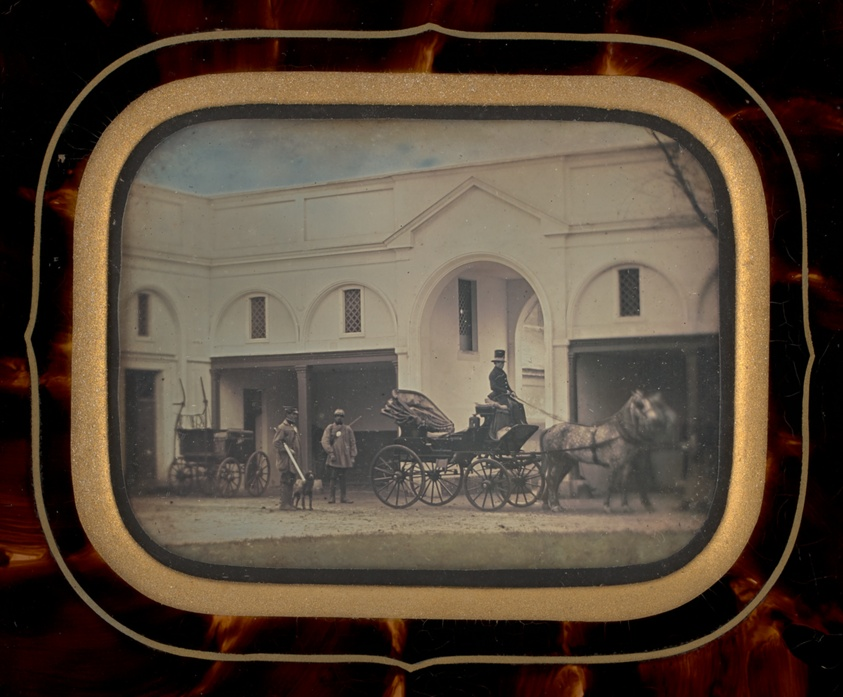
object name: Photograph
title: Untitled (Three Men and Horse-Drawn Carriage)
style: 19th century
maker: Unknown maker; French, 19th century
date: 1856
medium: Daguerreotype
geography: United States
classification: portrait; daguerreotype; photography; photograph; photographic process; portrait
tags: lundberg collection, dogs, horse-drawn carriage, horses, landscapes, urban life